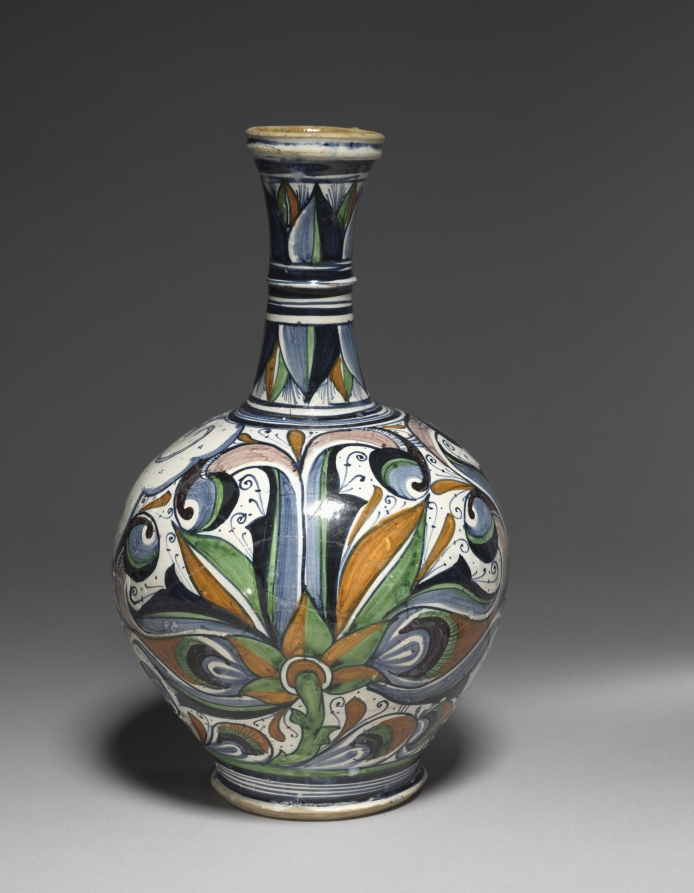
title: Pharmacy Bottle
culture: Italy, Papal States, Faenza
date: c. 1500–1510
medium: tin-glazed earthenware (maiolica)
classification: Ceramic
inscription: written in lower ribbon band: A. SCABIOS.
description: Pharmacy bottles that lined the shelves of Renaissance pharmacies often held medicinal herbs, spices, and ointments. The inscription on this bottle reads SCABIOS, or “scabious water,” which may refer to a teasel root compound that was used to clean and decontaminate velvet.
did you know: During the Renaissance, aristocrats tested the speed and agility of their greyhounds in a sport called "hare coursing."